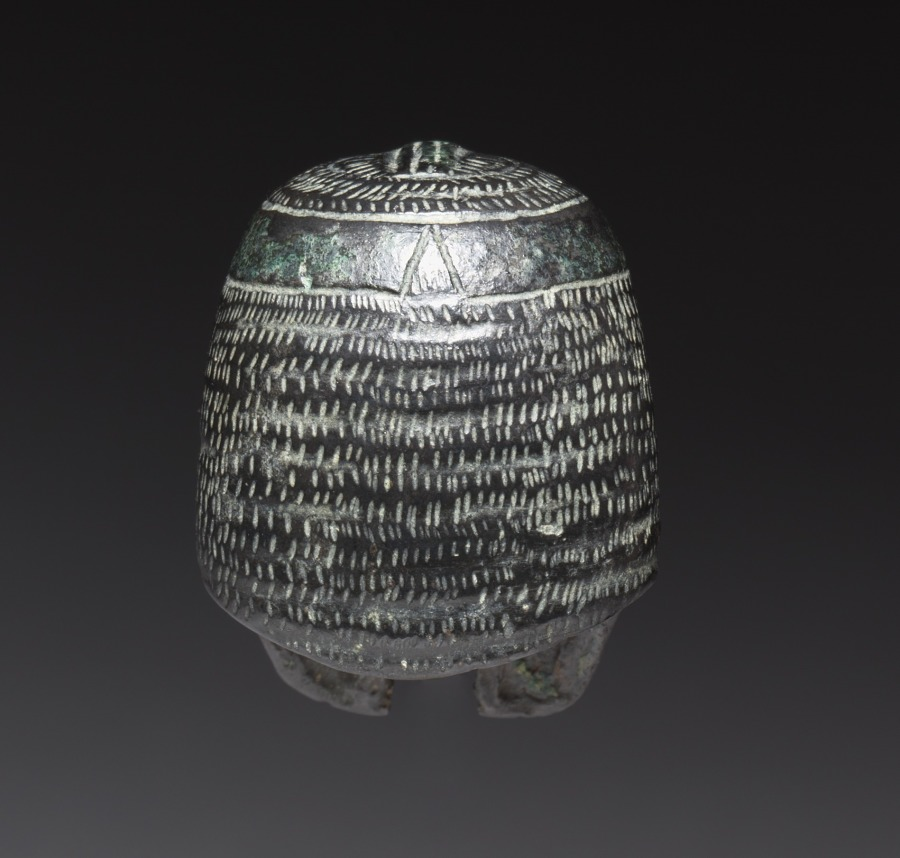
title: Bronze Mount from a "Shawabty Bundle": Head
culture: Egypt, Thebes, Wadi Qubbanet el-Qirud, New Kingdom (1540–1069 BCE), Dynasties 18–19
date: c. 1336–1256 BCE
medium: bronze, black copper wig, traces of gilding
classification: Funerary Equipment